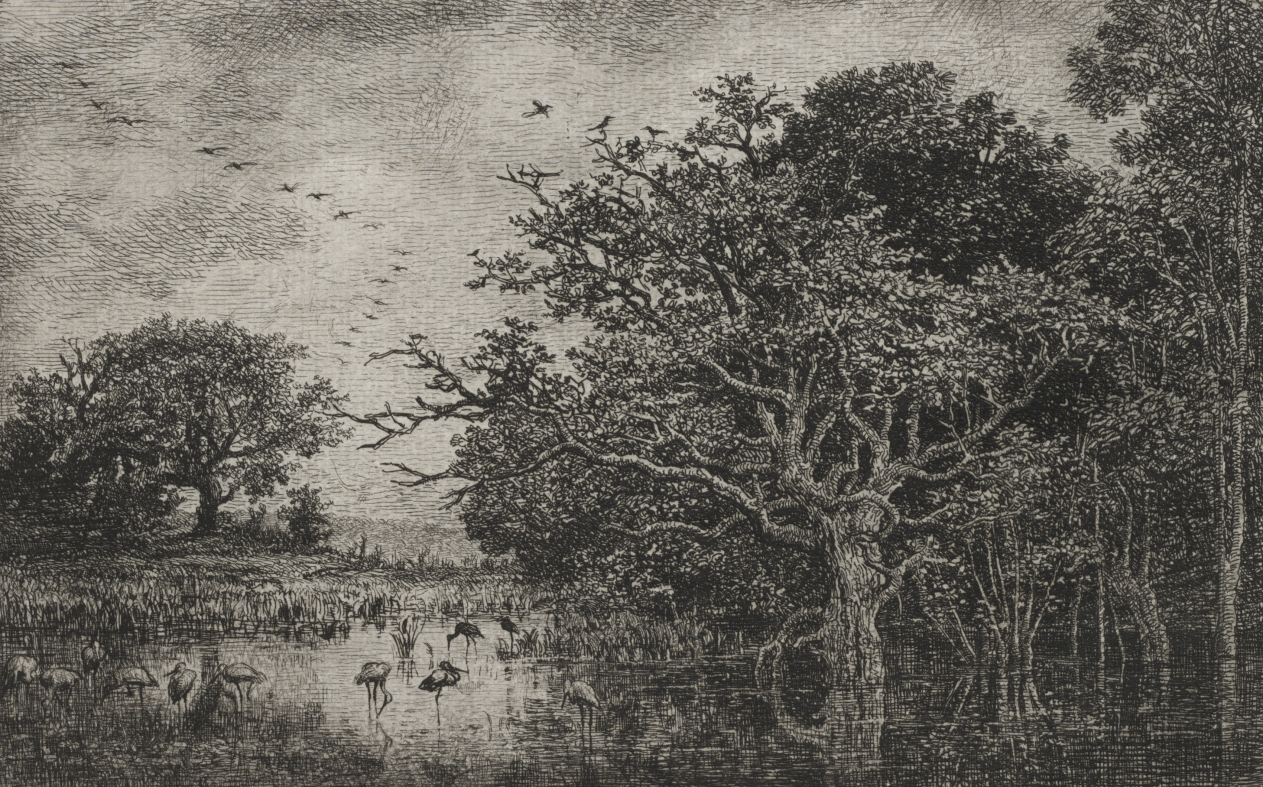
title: The Marsh with Storks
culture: France, 19th century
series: Published in "la Gazette des Beaux-Arts" on 1 March 1874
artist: Charles François Daubigny (French, 1817–1878)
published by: Auguste Delâtre (2nd state); A. Salmon (6th state)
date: c. 1851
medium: etching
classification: Print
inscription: signed, lower left, in plate: Daubigny inv. sculp.